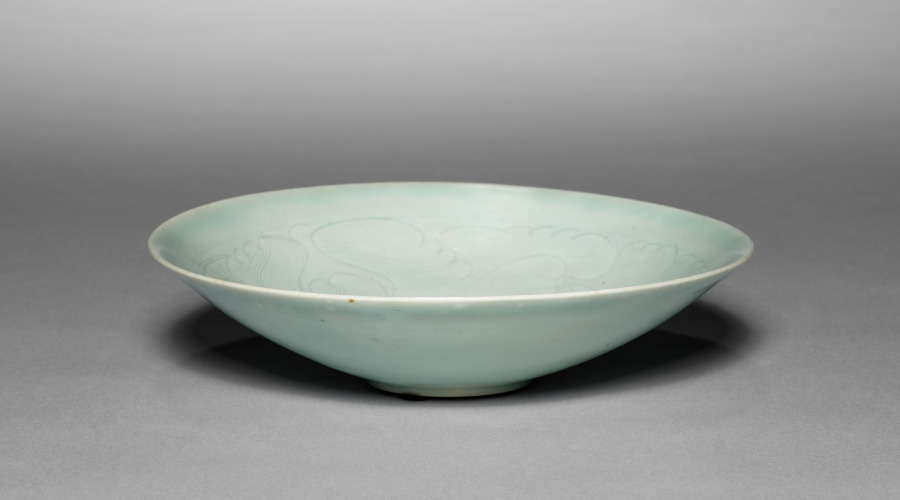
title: Dish with Carved Floral Design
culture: South China, Southern Song dynasty (1127–1279)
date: 1100s–1200s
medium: Porcelain with pale bluish-white (qingbai) glaze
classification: Ceramic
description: This shallow and wide bowl and the conical one (CMA 2020.182) are both hand-incised with decoration suggesting waves, clouds, or floral sprays. All of these motifs had auspicious meaning: waves and clouds bring rain that fertilizes the fields, and flowers and plants were often associated with the beauty of human virtues. The carved and combed designs were swiftly cut with a wooden tool into the unfired leather-hard body before glazing. Once the glaze was applied, it pooled in the incised areas rendering the design more visible.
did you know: Never intended for imperial use, qingbai ware was among the first mass-produced porcelain types and became a popular export.